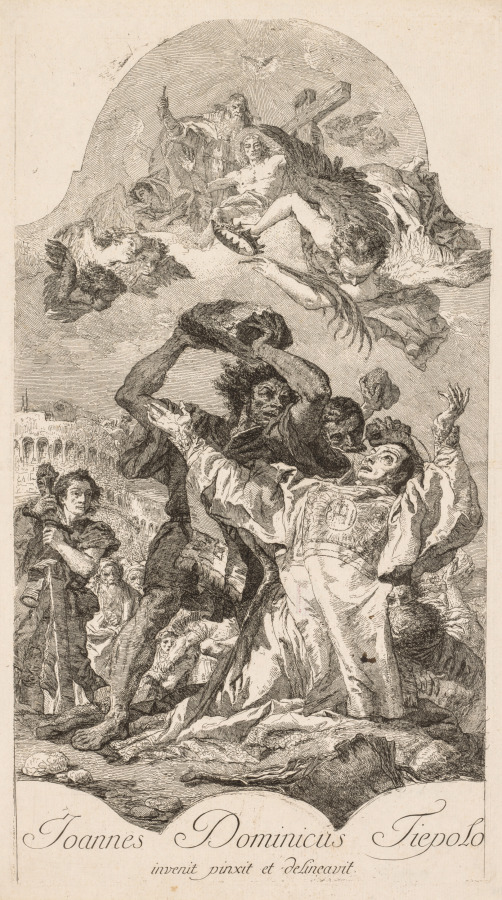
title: Martyrdom of St. Stephen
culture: Italy, 18th century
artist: Giovanni Domenico Tiepolo (Italian, 1727–1804)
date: c. 1750s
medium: etching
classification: Print